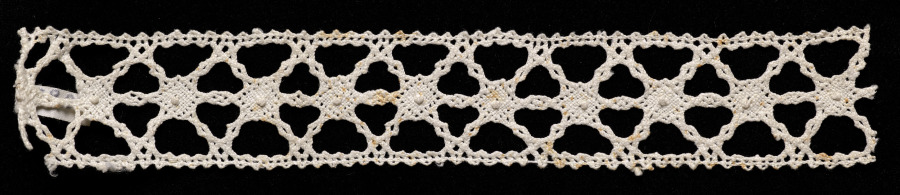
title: Lace Insertion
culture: Italy, Venice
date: 1540–60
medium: Bobbin lace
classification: Lace